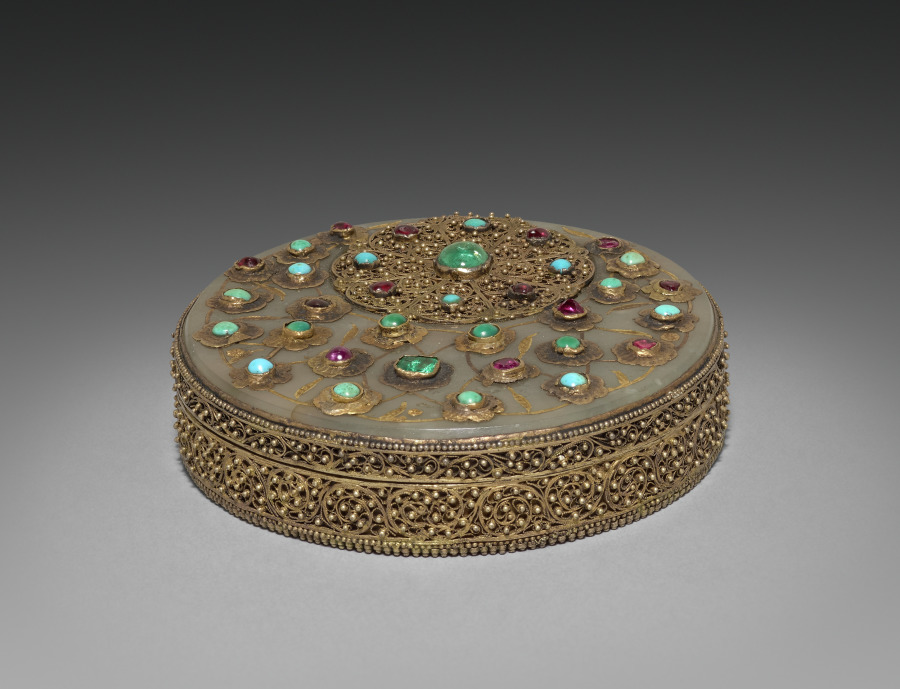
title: Box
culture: Germany ?, late 18th century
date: late 1700s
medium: enamel on copper with gilt metal mounts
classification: Miscellaneous